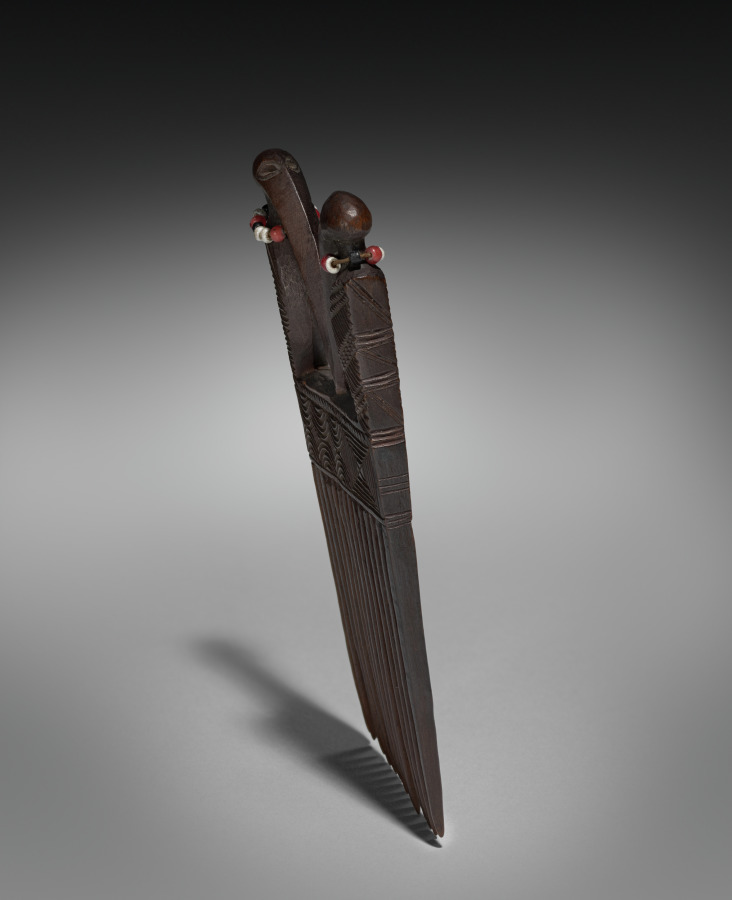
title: Comb (cisakulo)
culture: Africa, Central Africa, Angola, or Democratic Republic of Congo, Chokwe-style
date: mid- to late 1800s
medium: Wood, glass beads, and natural fibers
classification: Jewelry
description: Chokwe women and men inserted finely decorated combs and pins in their hair to signal rank and wealth. Here, as among neighboring peoples, hairstyles reflected changing trends across place and over time. This comb's wooden material and sculptural top made it of a higher value than simple examples made from metal or cane. Its wide teeth were practical, securing elements of a hairstyle in place. The long-beaked ngungu birds with beaded necklaces were a well-known symbol of chiefly power. In addition to being a sign of beauty and good health, a well-styled hairdo also suggests that the wearer relies on the help of others in its creation. Combs were often gifted to women by admirers or husbands to mark important life events. This comb entered the Cleveland Museum of Art's collection in 1915, one year before the museum opened its doors.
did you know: The double birds on this comb are the ngungu, a kind of hornbill linked to hunting and the related power of leaders. They were considered a good omen, and served as mediators between the earthly world and the spiritual one.